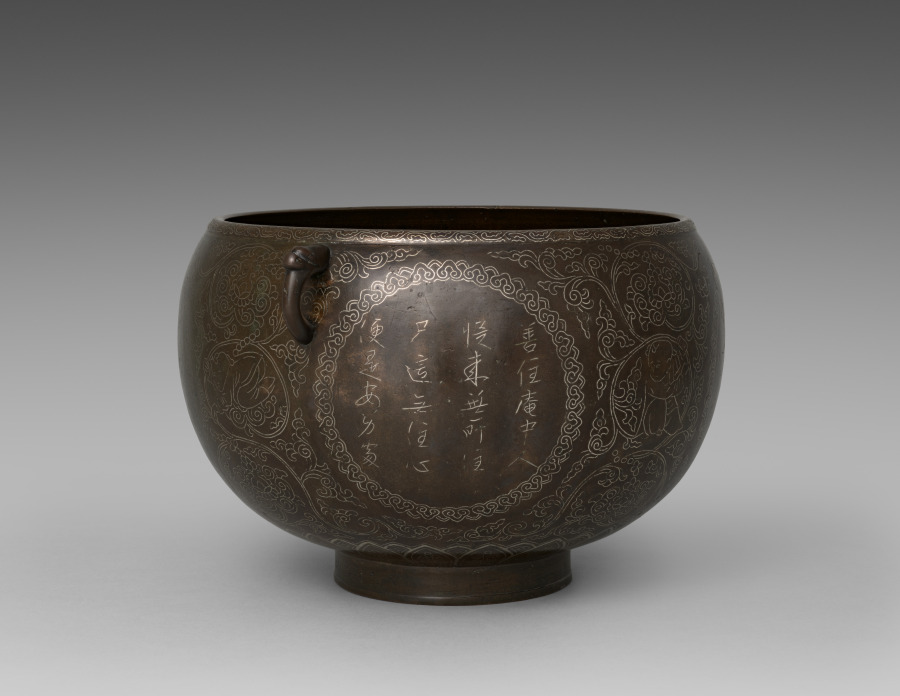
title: Basin with Inscribed Figures and Calligraphy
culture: Korea, Goryeo dynasty (918–1392)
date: 1100s–1200s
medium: bronze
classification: Metalwork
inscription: Each of the three roundels contain five-character, four-line poems with Buddhist messages.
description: This bronze basin may have been used for containing purified water. What makes this work charming is its intricate decoration done in silver inlay: the five-character, four-line poems interspersed among images of a child. The poems, which evoke the concept of nonattachment and nonduality, were written by Buddhist monks.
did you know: A child, one of the main decorative elements for this basin, is possibly a young Buddhist pilgrim named Sudhana, who took a long spiritual journey to search for enlightenment.